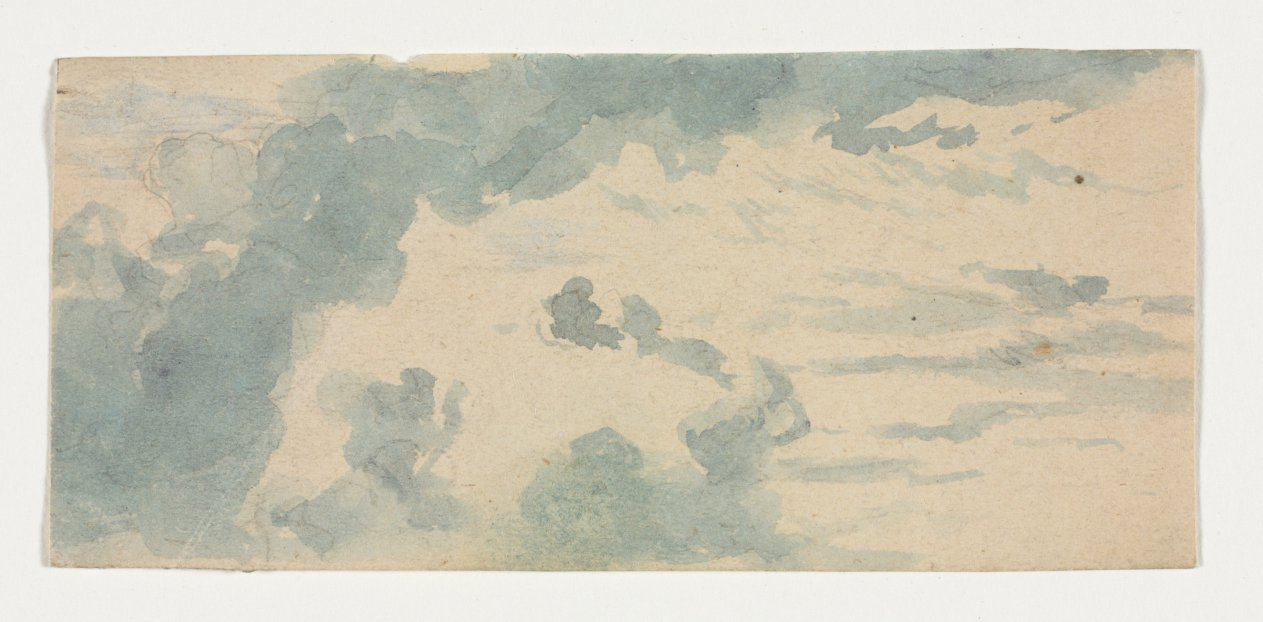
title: Cloud Study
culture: England, 19th century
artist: Anonymous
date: 1800s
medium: watercolor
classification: Drawing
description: Many English watercolorists of the period were especially interested in capturing natural effects of the landscape, such as cloud formations. Such studies were of particular interest to the French Impressionists.